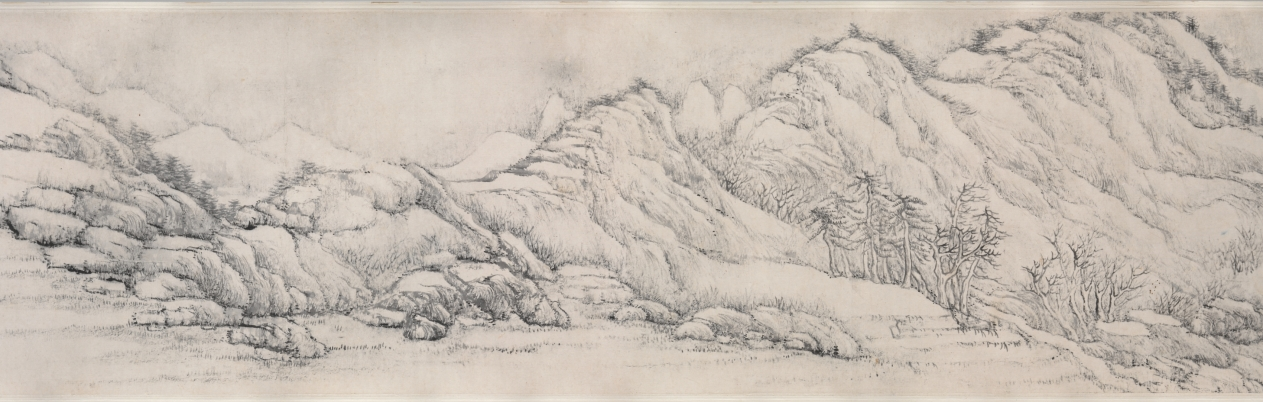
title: Snow Coloring the World White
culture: China, Qing dynasty (1644-1911)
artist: Fa Ruozhen (Chinese, 1613–1696)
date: 1690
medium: handscroll, ink on paper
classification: Painting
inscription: Artist's title on frontispiece, colophon with 6 poems, and 7 seals: [seal] Ch'ien-k'un i ts'ao t'ing. Snow Coloring the World White. Huang-shan lao-jen, Jo-chen, at the age of seventy eight. [2 seals] Fa yin Jo-chen; Huang-shih shih. (Artist's poems are not translated.) In the first month of the keng-wu year [1690], 1 was seventy-eight years old. On a snowy day I was pleased to have my good son-in-law Ch'eng-ssu and other gentlemen visiting me at my Tz'u-ching Hall at Yellow Hill. I did this snowscape to record the event. [2 seals] Fa Jo-chen; Tun Chai. [2 seals at end of painting] Fa yin Jo-chen; Huang-shih shih. trans. LYSL/WKH 12 additional seals: 8 of Ho Kuan-wu (20th c.); 1 of Wang Nan-p'ing (20th c.); 3 unidentified.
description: Fa Ruozhen was a scholar-official and prolific poet who focused on painting as his government career declined. The inscription records that he was 78 years old when he painted this handscroll to welcome visitors on a snowy day. At this point in his artistic development, Fa created expressive landscapes and experimented with unconventional brushwork. This handscroll begins at the right with gentle hills dotted with evergreens and bare deciduous trees. By the end, the twisting rocky forms dominate. Fa’s official career spanned the fall of the Han Chinese Ming dynasty (1368–1644) and the rise of the Manchurian Qing dynasty (1644–1911). While other scholar-officials who declined to serve the Manchus had their reputations enhanced, critics accused Fa of disloyalty for serving in the new bureaucracy. Fa was deeply sensitive about this criticism. In many of his 4,000 known poems, he responded by emphasizing the Confucian virtue of being a good administrator particularly during an unstable time. Fa’s “disorderly” brushwork and distressed landscapes seem to reflect the political upheaval of his era.